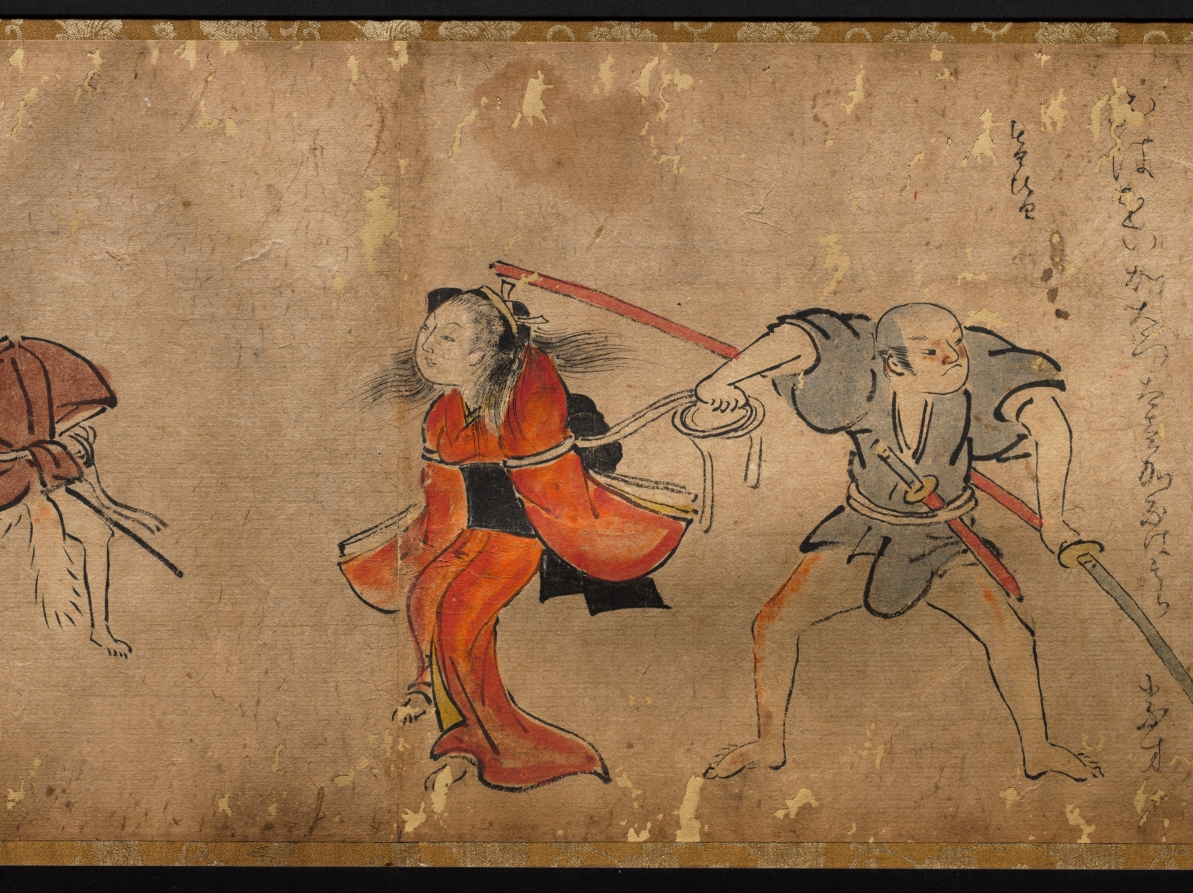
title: The Illustrated Tale of Oishi Hyōroku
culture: Japan, Edo period (1615–1868)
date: 1700s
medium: handscroll; ink and color on paper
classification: Painting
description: This incomplete handscroll illustrates part of the story of Oishi Hyoroku, a young man tasked with battling fox apparitions who were creating problems in his town. In other extant versions of the scroll, the story is set in the fall of 1624 in Kagoshima in southern Japan. Throughout the story, Hyoroku is tricked and terrified by the foxes that shift their shapes into a variety of monstrous phantoms. After repeated humiliations, he eventually captures two of the foxes. In this version, colloquial texts that function like text blurbs in comics appear throughout the scroll, but the main text is missing.